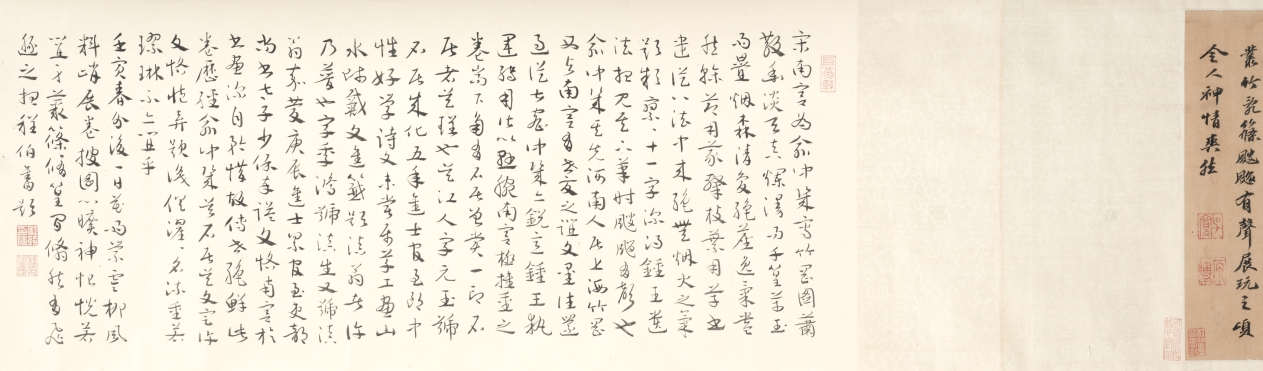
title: Landscape with Bamboo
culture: China, Yuan dynasty (1271-1368)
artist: Song Ke (Chinese, 1327–1387)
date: 1300s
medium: Handscroll; ink on paper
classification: Painting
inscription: 東吳宋克戲為仲幾畏友圖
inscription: 2 colophons and 14 additional seals: 1 seal of Yü Chung-chi (14th c.); 1 seal of Wu Ch'eng (1469 jinshi); 1 colophon and 2 seals of Wu K'uan (1435–1504); 1 colophon and 9 seals of Cheng Qi (1911–1988); 1 seal unidentified.